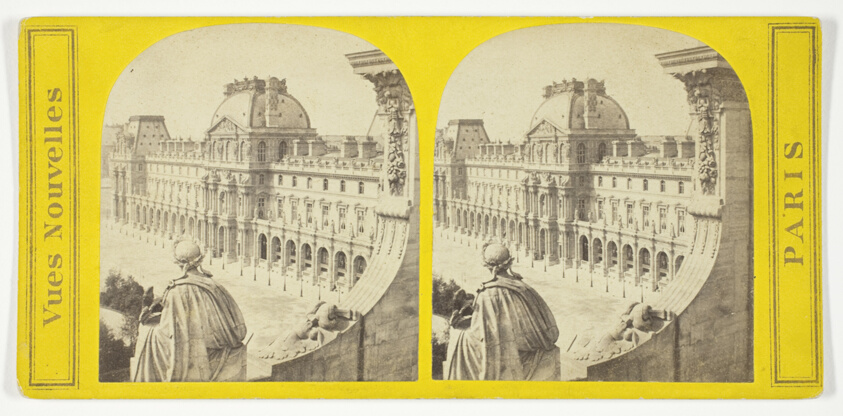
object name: Photograph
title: Paris, Nouveau Louvre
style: 19th century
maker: Artist unknown; French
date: c. 1874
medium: Albumen print, stereo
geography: France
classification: photography; stereograph (albumen); albumen silver print; photographic process; photograph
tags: Paris